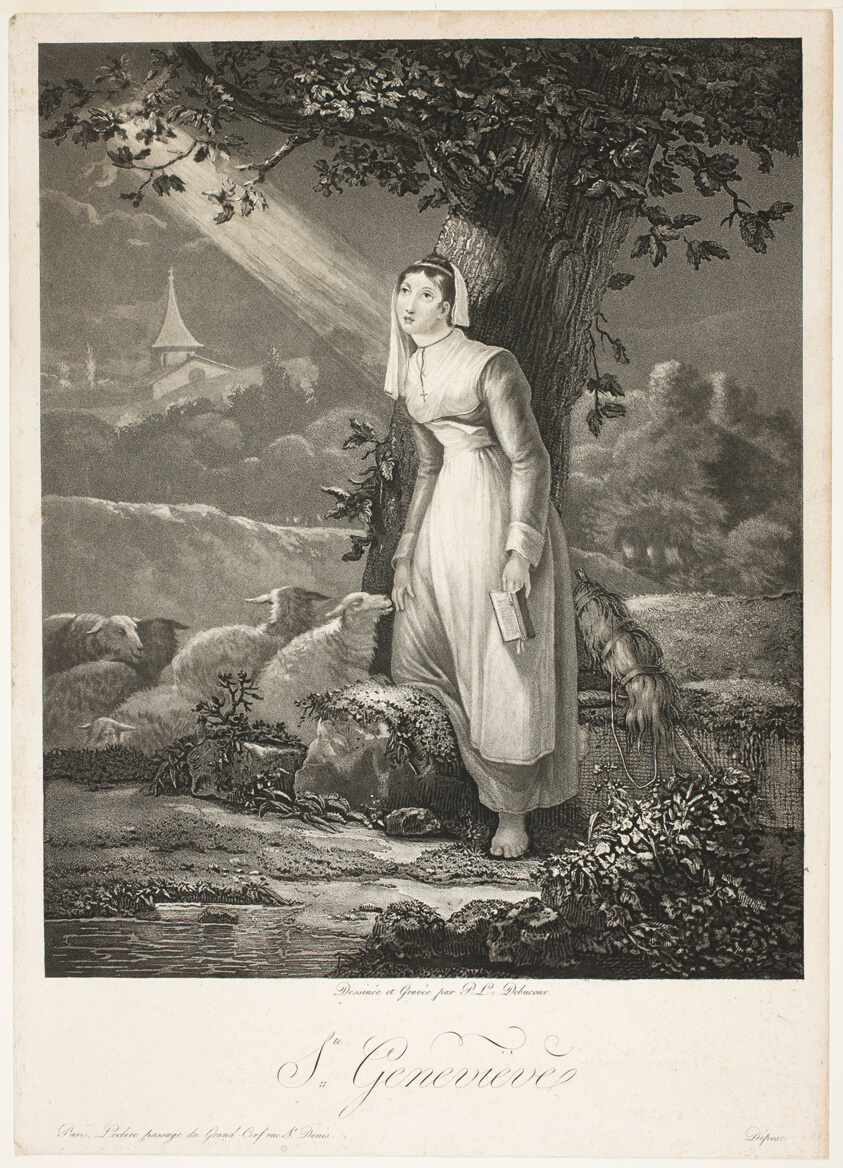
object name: Print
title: Saint Genevieve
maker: Philibert Louis Debucourt (French, 1755-1832)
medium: Etching on ivory laid paper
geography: France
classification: etching; print; prints and drawing